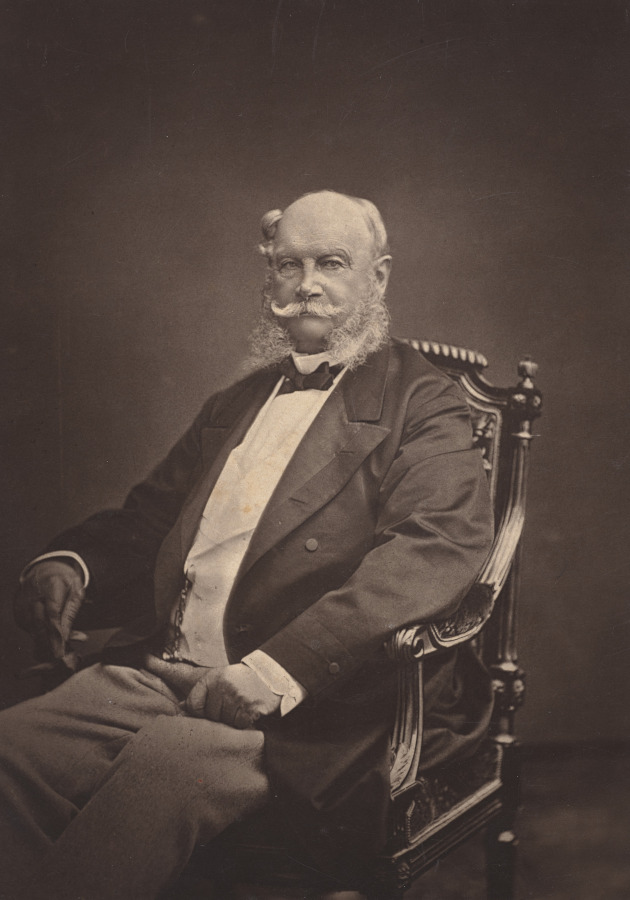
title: Wilhelm I, King of Prussia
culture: Germany, 19th century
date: 1870s–88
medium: albumen print, cabinet card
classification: Photograph